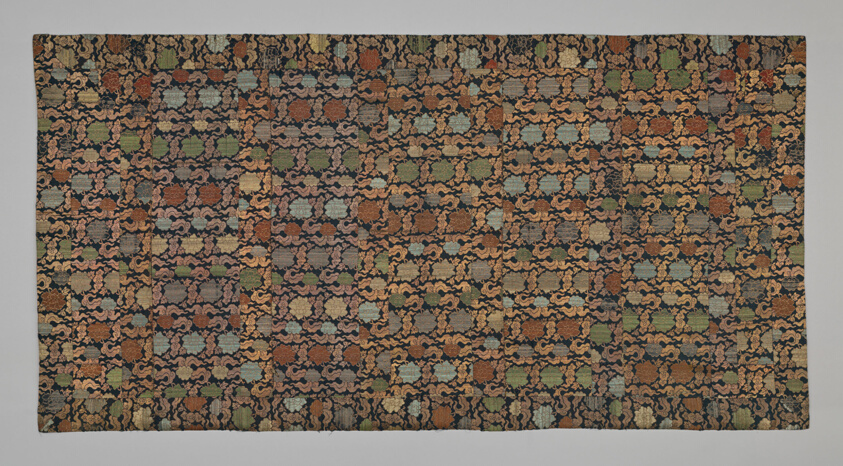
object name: Textile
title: Kesa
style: meiji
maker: Japan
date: late Edo period (1789–1868), early 19th century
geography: Japan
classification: textile; costume; liturgical - buddhist; weaving